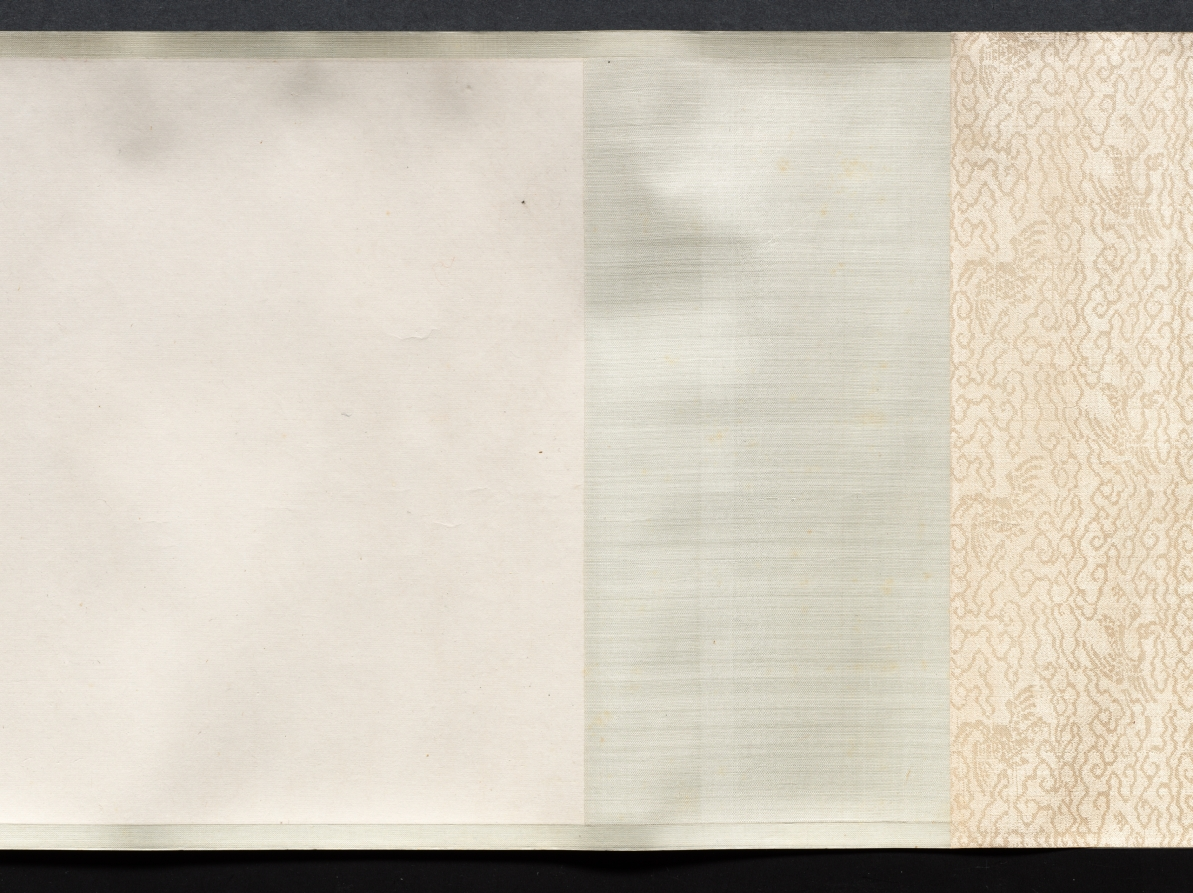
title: Autumn Mist in the Countryside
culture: China, Qing dynasty (1644-1911)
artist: Zou Zhe (Chinese, c. 1610-before 1688)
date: 1647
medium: handscroll, ink and color on paper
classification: Painting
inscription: Artist's inscription, signature, and seal: The first day of the sixth lunar month, the ting-hai year [1647], Tsou Che painted [this]. [seal] Fang-lu.